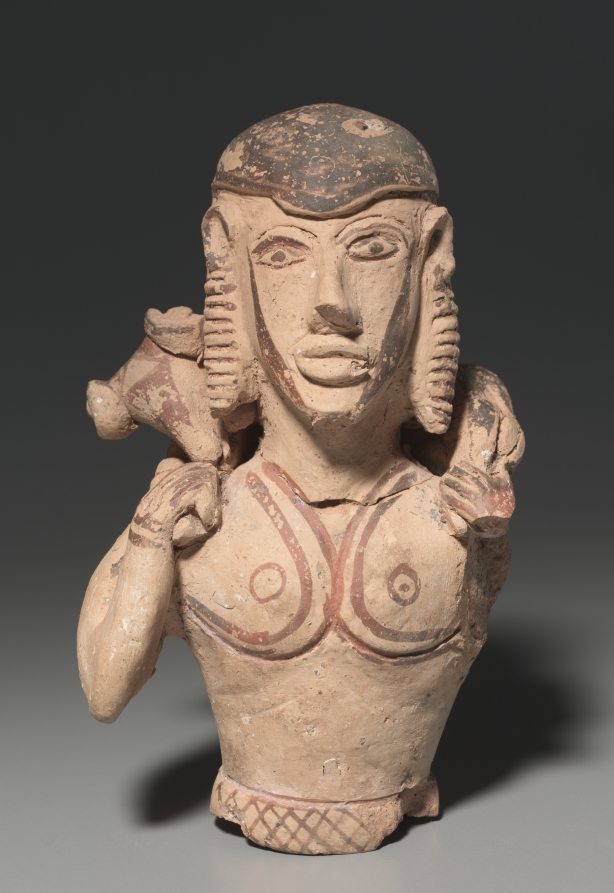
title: Kriophoros (Ram-Bearer), Statuette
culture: Greece, Crete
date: 650–600 BCE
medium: terracotta and polychrome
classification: Sculpture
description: In Greek art, the kriophoros is usually a shepherd or, later, Hermes. This statuette may be unique in presenting a warrior-hero as kriophoros. It is certainly one of the earliest sculptural representations of this type. The figure appears to be wearing a helmet, secured under the chin with a painted strap. Double outlines, reinforced at the bottom with incision and adorned with dotted circles in the area of the nipples, were used to suggest breastplates. A thick waist belt, decorated with painted crosshatched lines, is clearly the heroic zoster (warrior's belt). As described in ancient Homeric poetry, the zoster is the ultimate symbol of valor and prowess, worn by such heroes as the brothers Agamemnon and Menelaos and old King Nestor. This figure is shown in the solemn act of presenting a ram, most likely as a sacrificial offering, to a god or goddess.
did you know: This heroic figure is shown presenting a ram, most likely as a sacrificial offering to a god or goddess.